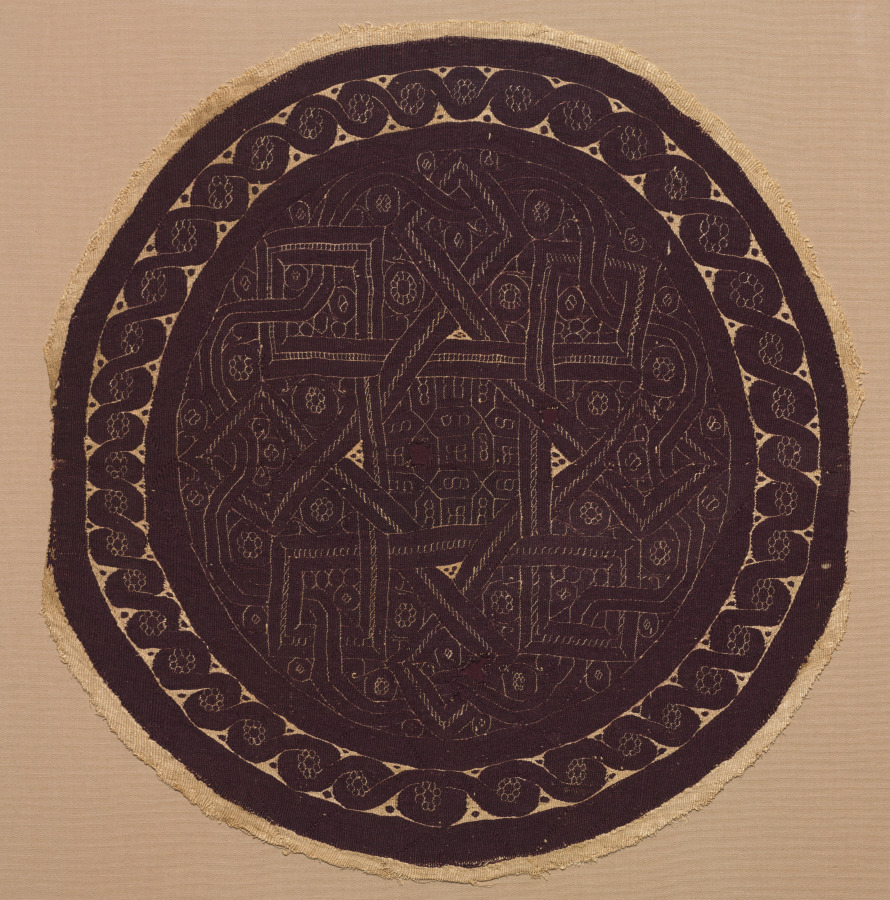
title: Roundel from a Curtain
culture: Egypt, Byzantine period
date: 300s CE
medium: plain weave ground with tapestry weave and supplementary weft wrapping; undyed linen and dyed wool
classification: Textile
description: This circular element called a roundel that originally decorated a curtain displays a perfectly interlaced knot, a design believed to provide protection from harm. Curtains were often used as modular walls in houses, theaters, and Christian churches during the late Roman and early Christian periods.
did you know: The purple color was achieved with kermes, a dye derived from the dried bodies of insects of the same name.